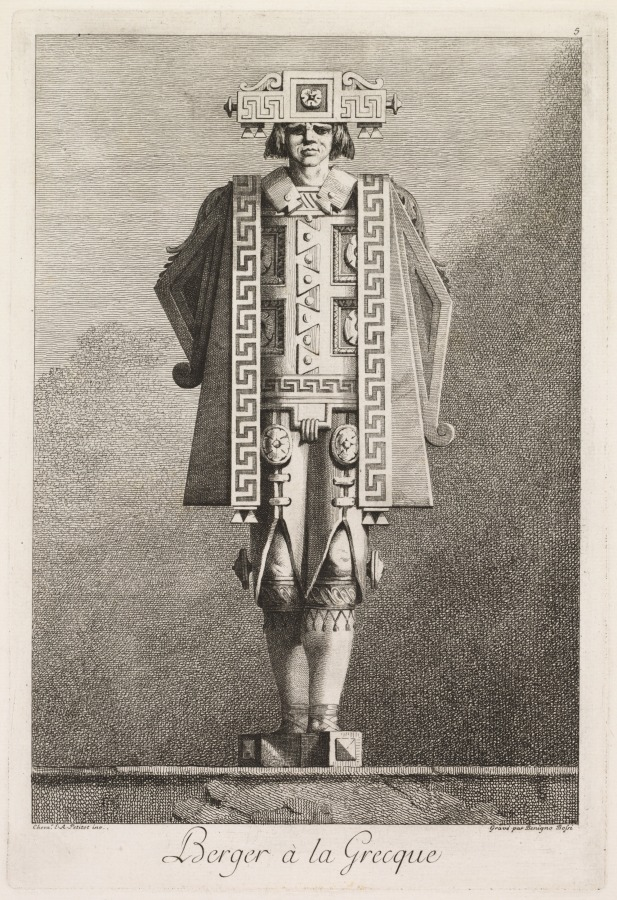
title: Shepherd in the Greek Style, Plate 5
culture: Italy, 18th century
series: Mascarade à la Grecque:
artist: Benigno Bossi (Italian, 1727–1792)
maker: after Ennemond Alexandre Petitot (French, 1727-1801)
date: 1771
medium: etching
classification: Print